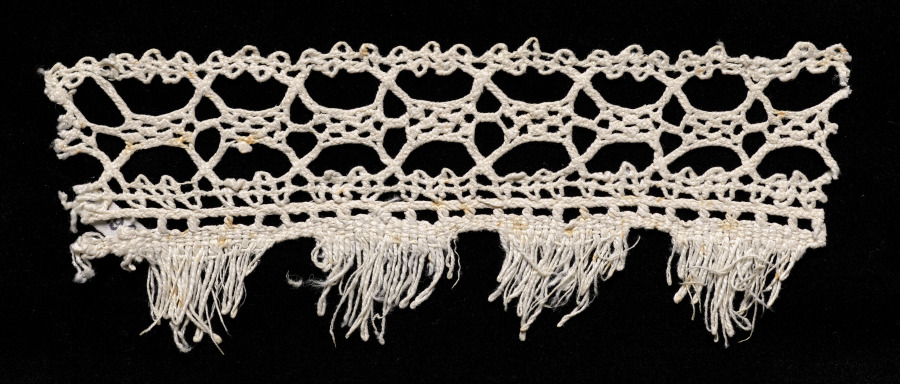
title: Lace Insertion with Fringe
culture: Italy, Venice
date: 1540–60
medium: Bobbin lace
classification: Lace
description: This lace fragment is the same design as 1920.843.